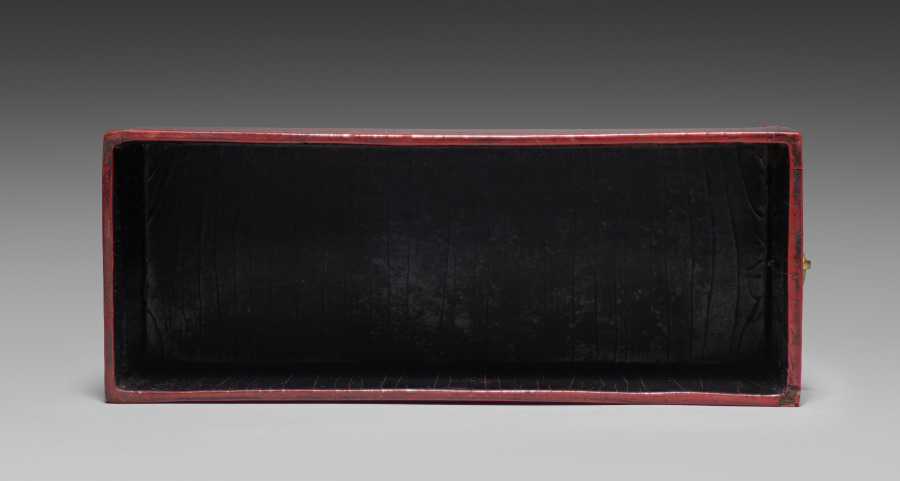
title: Drawer for a Tihong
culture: China, Ming dynasty (1368-1644), Wanli reign (1572-1620)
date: 1585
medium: carved cinnabar lacquer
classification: Lacquer